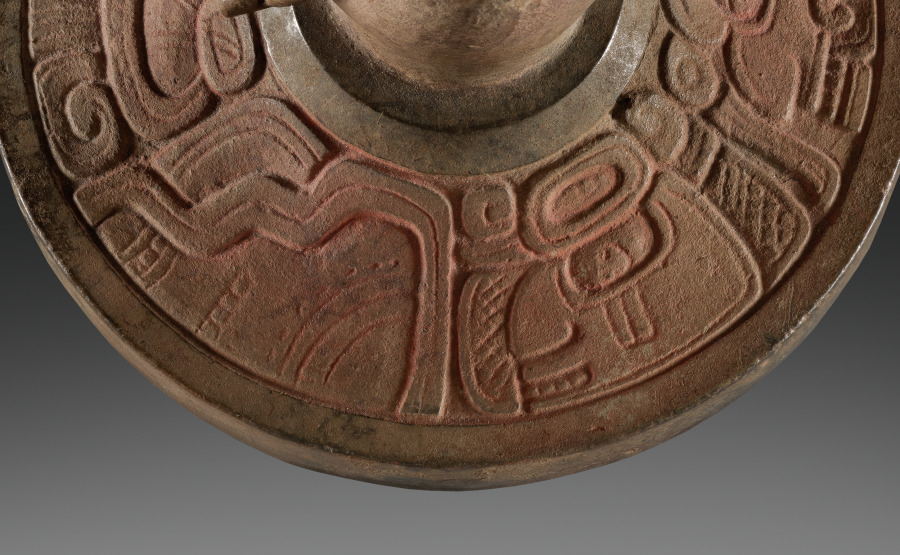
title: Tripod Vessel with Lid (lid)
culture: Mexico or Central America, Maya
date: 250–600 CE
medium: earthenware with pigment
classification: Ceramic